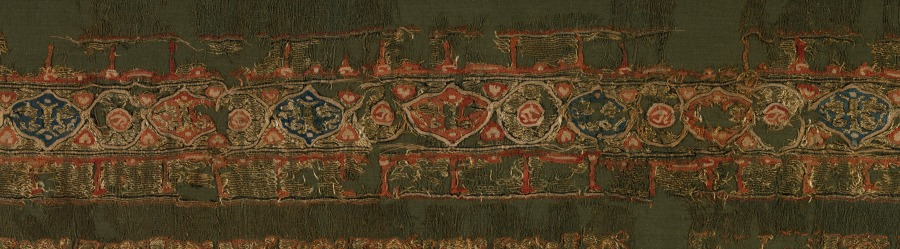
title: Tiraz with gold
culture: Egypt, Fatimid period, reign of Caliph al-Musta‘lī, 1094–1101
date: 1094–1101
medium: plain weave with inwoven tapestry weave: linen, silk, and gold filé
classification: Textile